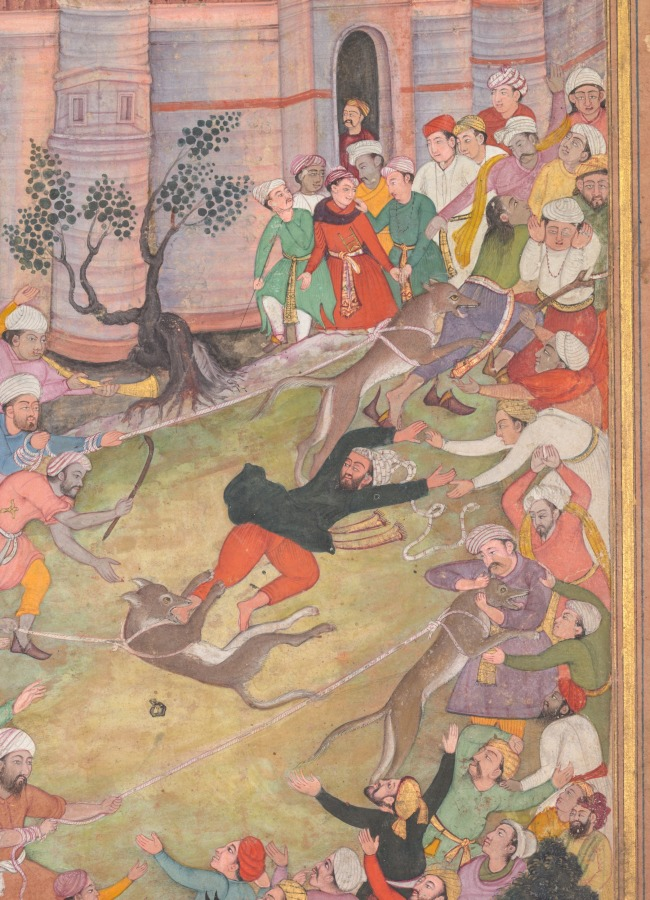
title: The game of wolf-running in Tabriz, from an Akbar-nama (Book of Akbar)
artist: Banavari 1 (Indian, active 1550s-1590s)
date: c. 1595–1600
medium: Gum tempera, ink, and gold on paper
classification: Painting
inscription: signed by Banwari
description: After four years of traveling in exile, fleeing Afghan forces, Humayun reached Tabriz, the glittering capital of the Safavid dynasty in northwestern Iran, here imaginatively rendered by the Indian artist. There the second Mughal emperor enjoyed warm hospitality extended by the shah of Iran, who called for a game of wolf-running for which the city was famous. Artists painting during the time of Akbar, late in his reign when historical subjects dominated, speculated as to how the game was played, based on eyewitness accounts. They gave the figures lively emotive expressions and gestures, and the dense crowding successfully conveys the pandemonium of the scene.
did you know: During extreme activities, turbans could come unwound and fall off.